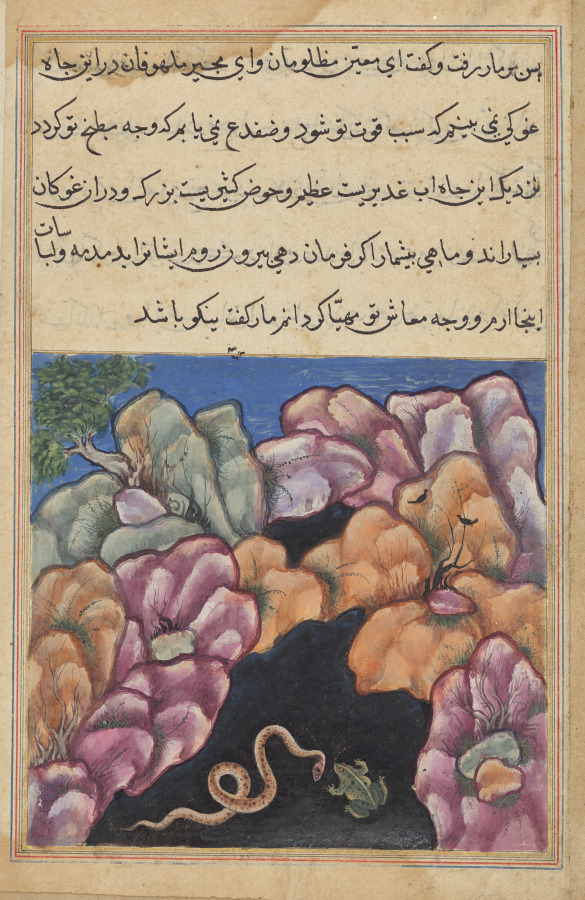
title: The snake enters into an argument with the frog, from a Tuti-nama (Tales of a Parrot): Twenty-sixth Night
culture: Mughal India, court of Akbar (reigned 1556–1605)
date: c. 1560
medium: gum tempera, ink, and gold on paper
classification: Painting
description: Cave compositions were replicated for multiple types of scenes in India, based on Persian models like the Shah-nama painting CMA 1988.96.a. The black background of the caves in the Tuti-nama provides the viewer a window into a subterranean space, the mouth of which is shown amid the rocks above. Shapur, the exiled frog tyrant, asked a snake to devour his enemies. However, when the snake became hungry again, he ate Shapur’s friends and family. Without any subjects to rule, the frog escaped his dangerous ally and lived out his life, sad and alone.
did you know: The story takes place in China.